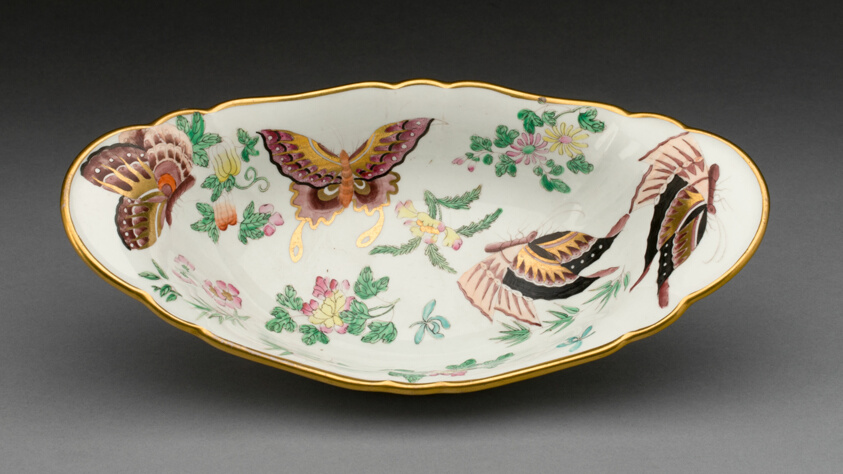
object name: Ceramics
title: Boat-Shaped Dish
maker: Wedgwood Manufactory (England, founded 1759)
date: c. 1820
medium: Porcelain with polychrome enamels and gilding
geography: Burslem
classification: dish (vessel); tableware; porcelain; european decorative arts; ceramics